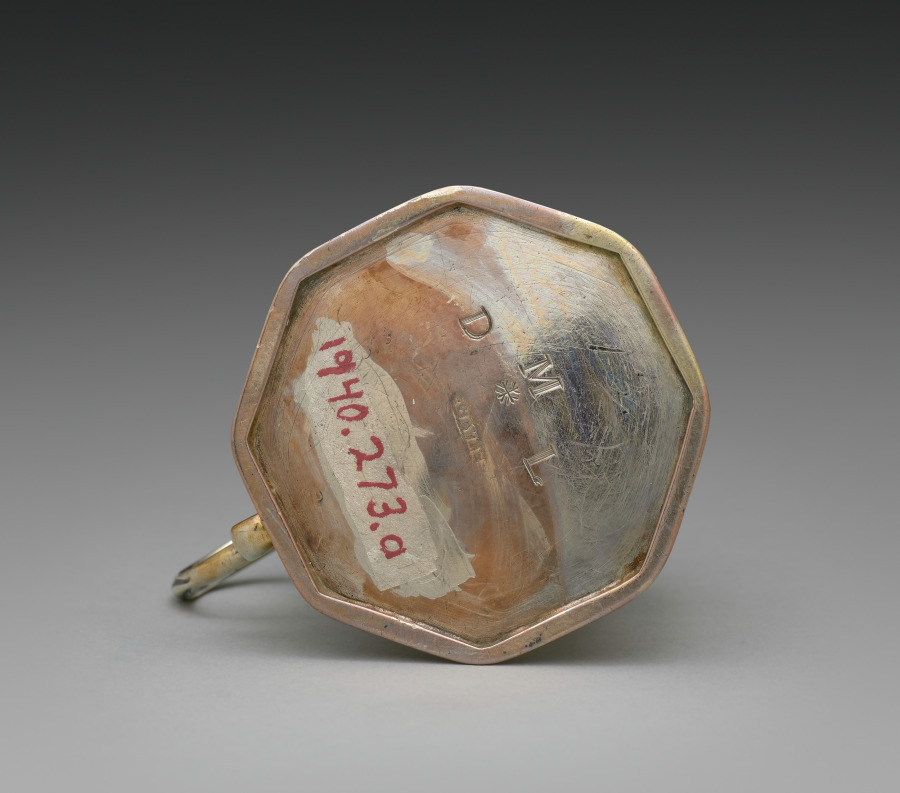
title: Caster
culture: America, Massachusetts, Boston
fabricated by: Andrew Tyler (American, 1692–1741)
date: c. 1720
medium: silver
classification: Silver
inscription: engraved: "M" over "D * L" in shaded block letters on bottom, and "AM" in block letters on front, opposite handle.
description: A caster was used to spread a finely ground substance, probably pepper.